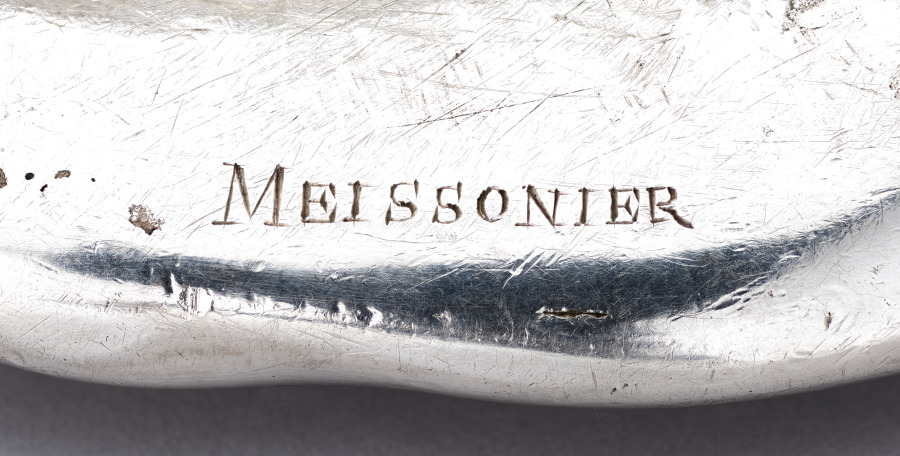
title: Tureen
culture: France, Paris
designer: Juste-Aurèle Meissonnier (French, 1695–1750)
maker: Pierre-François Bonnestrenne (French)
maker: Henry Adnet (French, 1745)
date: 1735–38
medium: silver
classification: Silver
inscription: engraved Meissonnier signature.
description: See entry for cover record 1977.182.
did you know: The langoustine, pigeon, and vegetables were cast using real examples giving the silver copies lifelike detail and appearance.